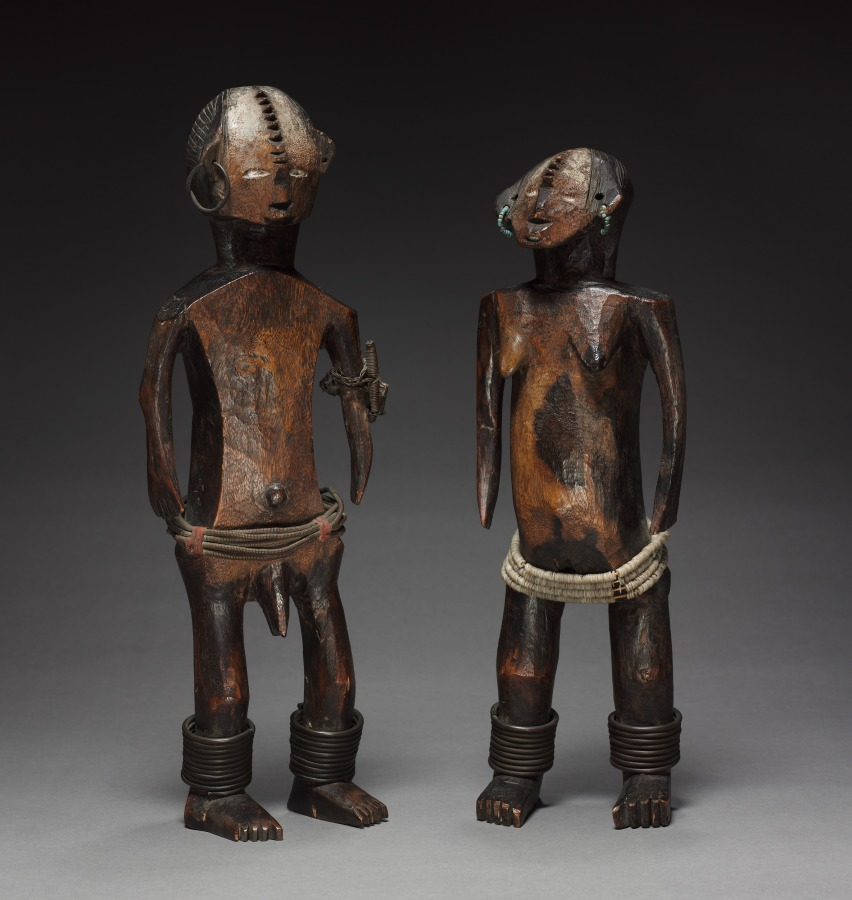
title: Pair of Figures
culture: Africa, Central Africa, Democratic Republic of Congo, probably Ngbandi-style carver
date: late 1800s-early 1900s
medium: Wood, iron alloy, copper alloy, glass beads, plant fiber, and cloth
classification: Sculpture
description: Carving of paired figures is quite well documented among the Ngbandi and its neighbors the Ngbaka-Minagende, where such sculptures are said to represent the mythical ancestor Seto and his sister-wife, Nabo. Field-based research cannot confirm the existence of figurative couples among the Ngbandi.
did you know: Odette Delenne, the collector of this pair, once stated that these figures reminded her of herself and her husband, René.